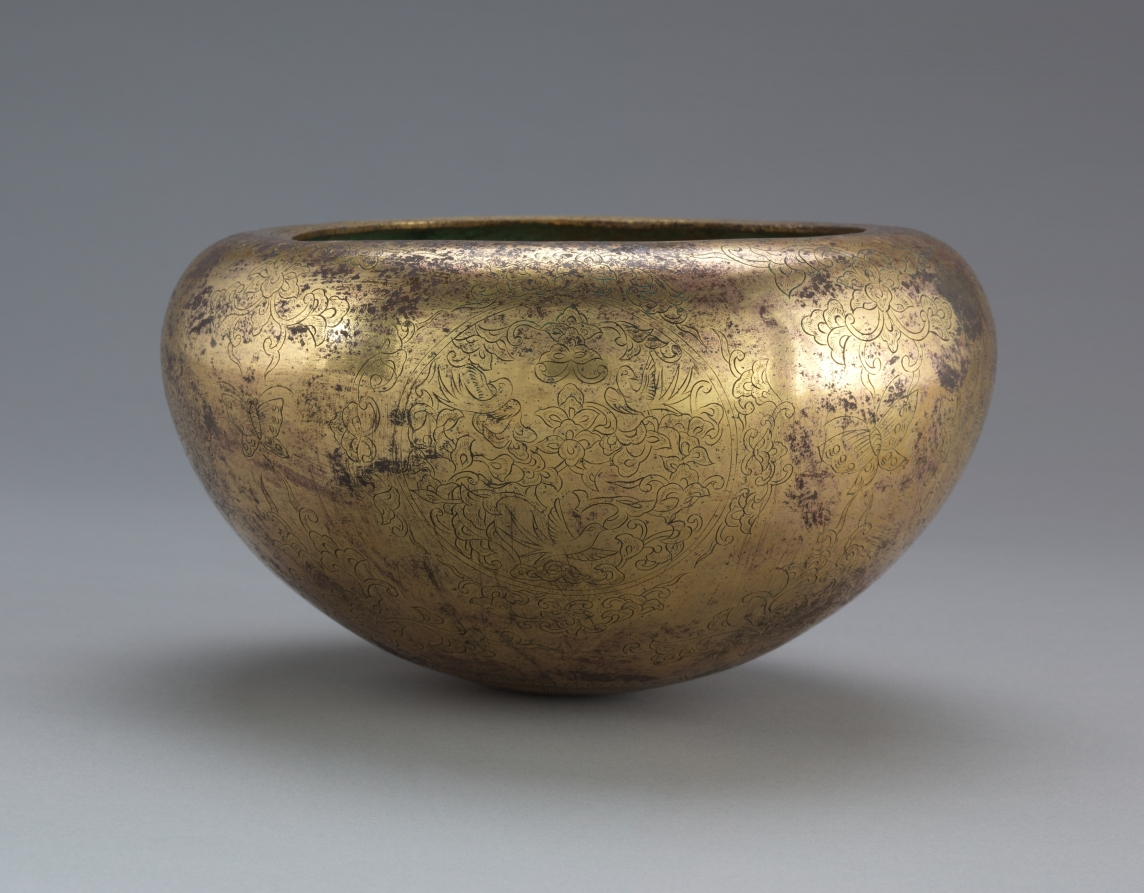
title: Alms Bowl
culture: Japan, Heian period (794–1185)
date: c. 900s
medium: gilt bronze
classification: Metalwork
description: Alms bowls used by Buddhist monks to receive donations have traditionally been made of iron or wood. This bowl, made of gilt bronze and decorated with incised designs of birds and flowers in roundels as well as butterflies, is instead a luxury item likely meant for a Buddhist altar, where it would have contained offerings for a Buddhist deity.